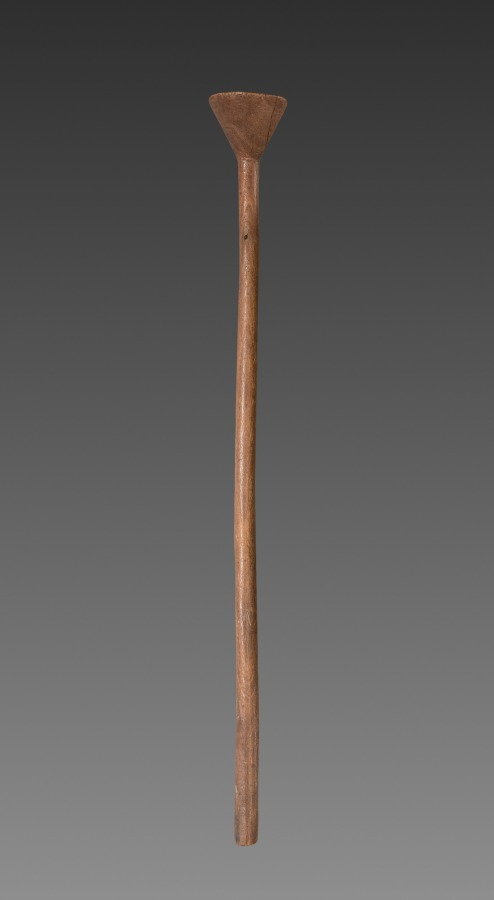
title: Wooden Staff or Support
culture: Egypt, Middle Kingdom (2040–1648 BCE), Dynasties 11–12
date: 2030–1650 BCE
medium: wood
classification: Wood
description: This staff has a terminal in the shape of papyrus umbel serving as a support for some other detail now missing.